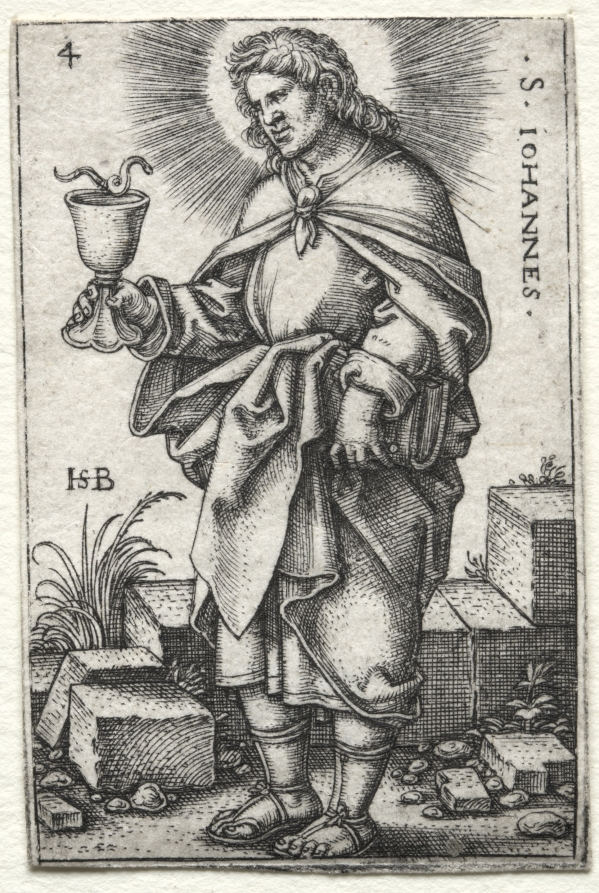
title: St. John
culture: Germany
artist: Hans Sebald Beham (German, 1500–1550)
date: 1545–1546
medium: engraving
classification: Print